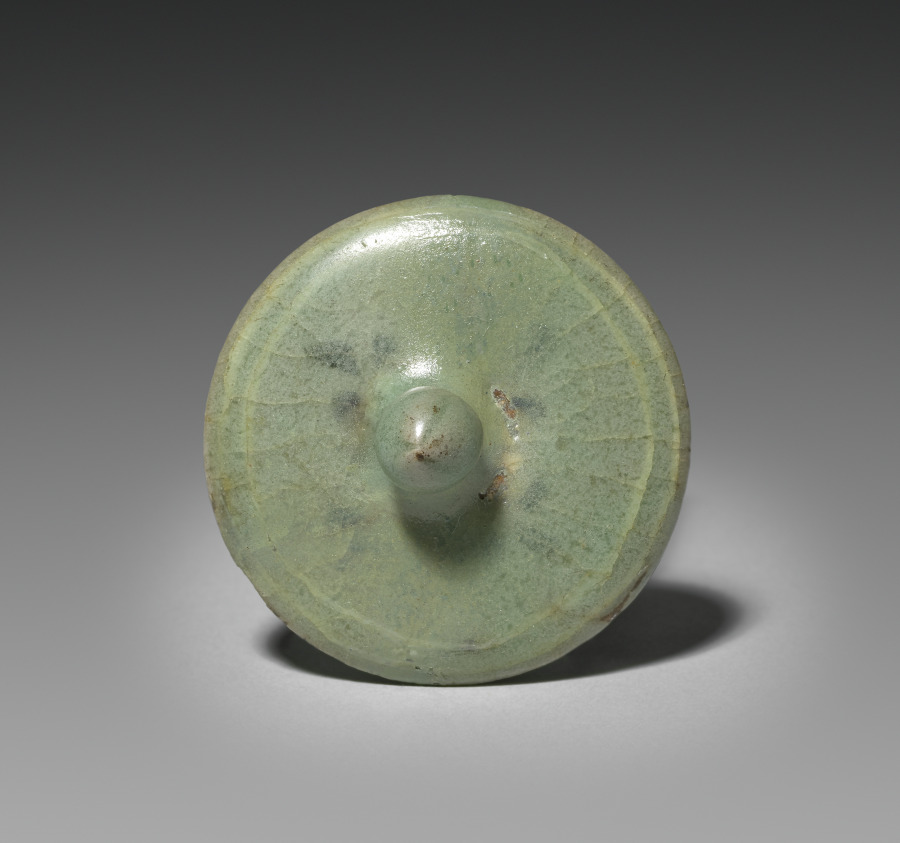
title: Cover for a Pitcher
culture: Korea, Goryeo dynasty (918–1392)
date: 1100s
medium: celadon ware with inlaid white and black slip decoration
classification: Ceramic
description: As early as the seventh century, the practice of drinking tea and wine became an important part of elite leisure culture in Korea. This lid once served as a lid for a tea pot.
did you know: During the Goryeo period, a variety of types of tea ware were widely used. This lid once served as a lid of a teapot.